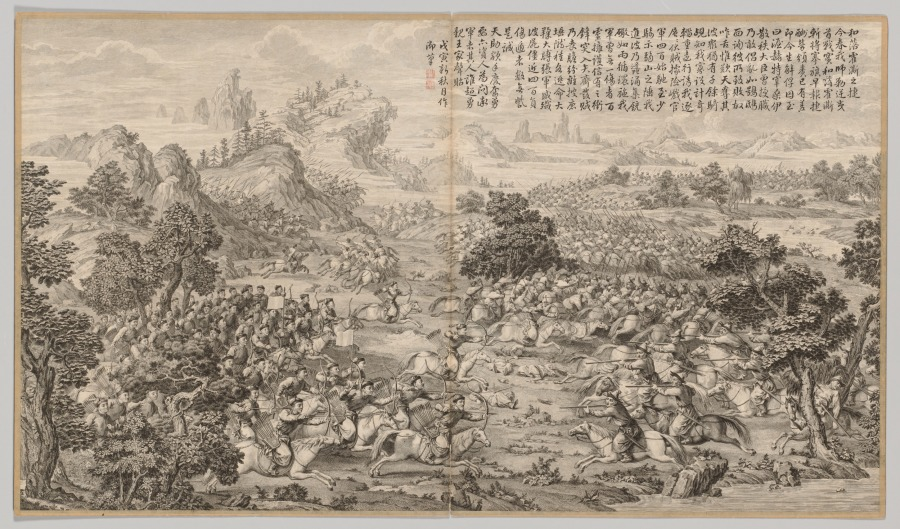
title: Victory at Heluo Heshi: from Battle Scenes of the Quelling of Rebellions in the Western Regions, with Imperial Poems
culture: China, Qing dynasty (1644–1911), Qianlong reign (1736–95)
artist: Jean Denis Attiret (French, 1702–1768)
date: c. 1765–74; poem dated 1758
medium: etching, mounted in album form, 16 leaves plus two additional leaves of inscriptions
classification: Print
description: This set of etchings was commissioned by Emperor Qianlong to record in pictorial terms the courage of his generals and soldiers in quelling the rebellions in the Western Regions. Qianlong added his own poem to each of the etchings, indicating his appreciation and pride in this demonstration of military might. "Western Regions" refers to the present-day Xingjiang province, often described in Western writing as "Central Asia."